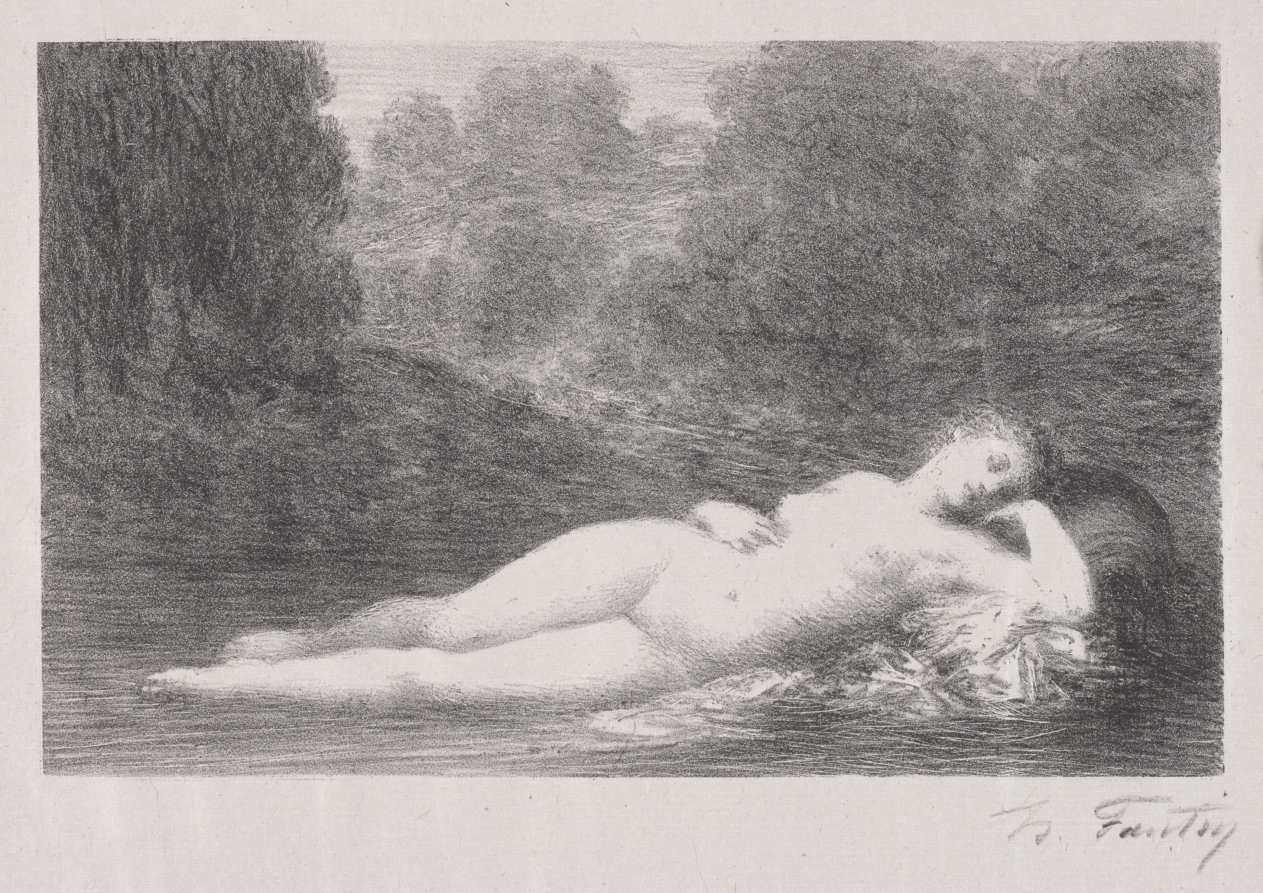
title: Lying in the Water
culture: France, early 20th Century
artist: Henri Fantin-Latour (French, 1836–1904)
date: 1903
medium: lithograph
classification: Print